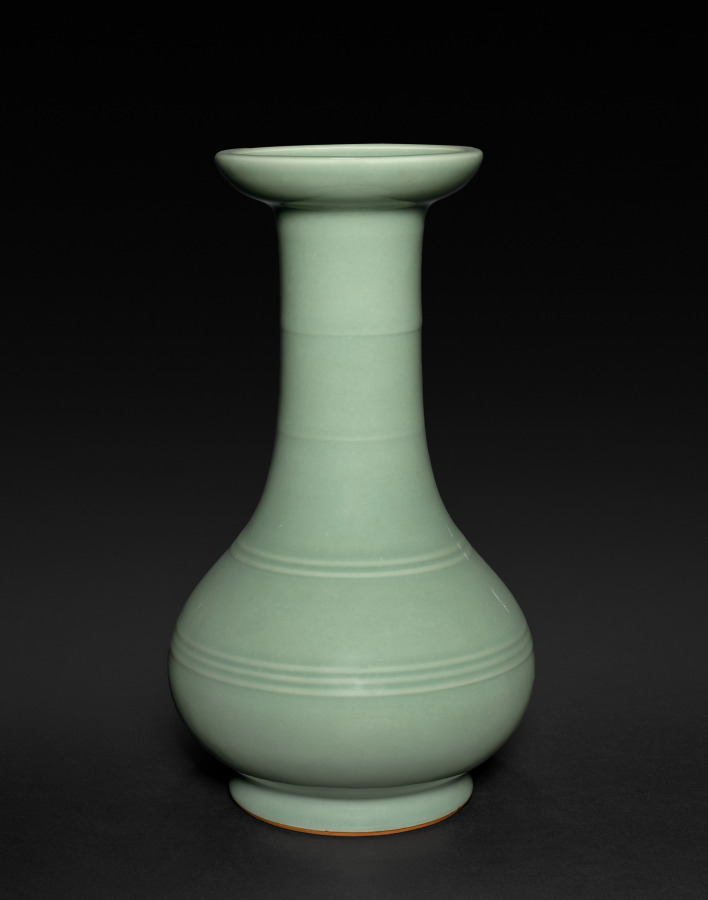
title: Vase with Bamboo Joints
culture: Japan, Taishō period (1912–26)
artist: Seifū Yohei IV (Japanese, 1872–1951)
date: 1914–46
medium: Porcelain with green glaze and molded design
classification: Ceramic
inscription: 清風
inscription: 清風造【印】清風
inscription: 成山清風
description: Yohei IV’s Vase with Bamboo Joints has a shape often seen in pairs of bronze flower vases placed to either side of Buddhist altars before sculptural icons. While the term hisoku (Chinese mise 秘色), or “mysterious color” glazing, indicates a more specific green color than seiji 青磁, a more general word for green-glazed porcelain, there is still some range in the actual color of the glaze.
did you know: Many ceramics created by the Seifū Studio refer to and emulate Chinese ceramics in form and glazing.